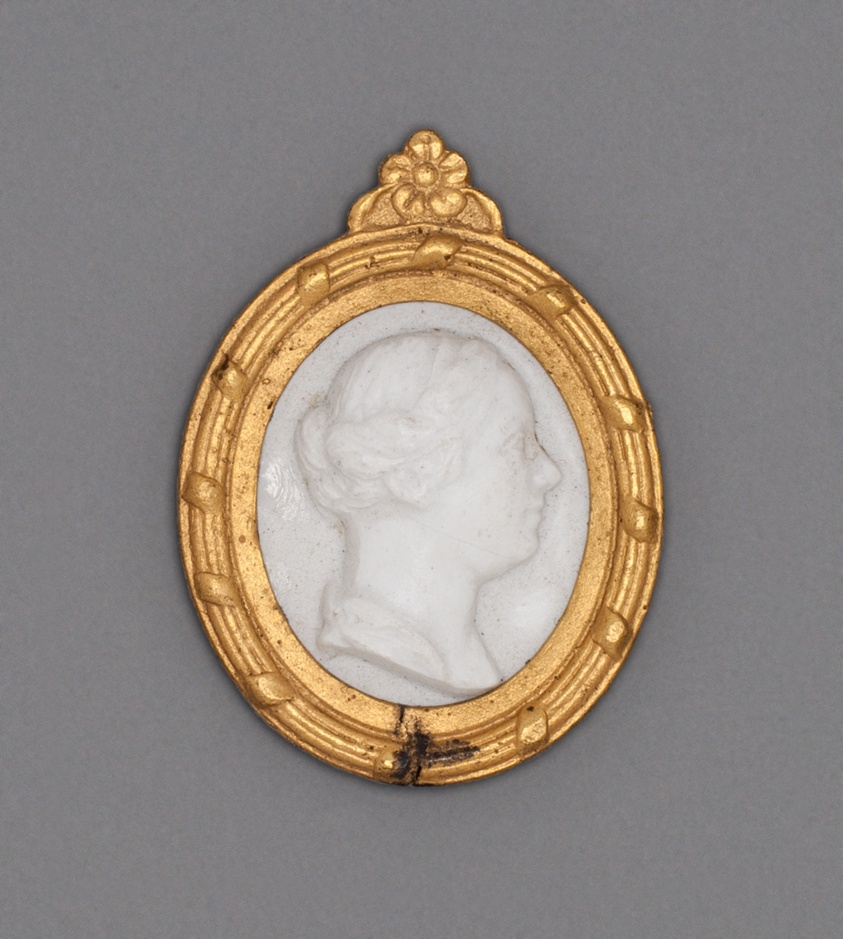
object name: Ceramics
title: Cameo with Head of a Woman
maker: Wedgwood Manufactory (England, founded 1759)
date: Late 18th century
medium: Stoneware (jasperware)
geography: Burslem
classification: cameo (sculpture); sculpture; stoneware; european decorative arts; ceramics